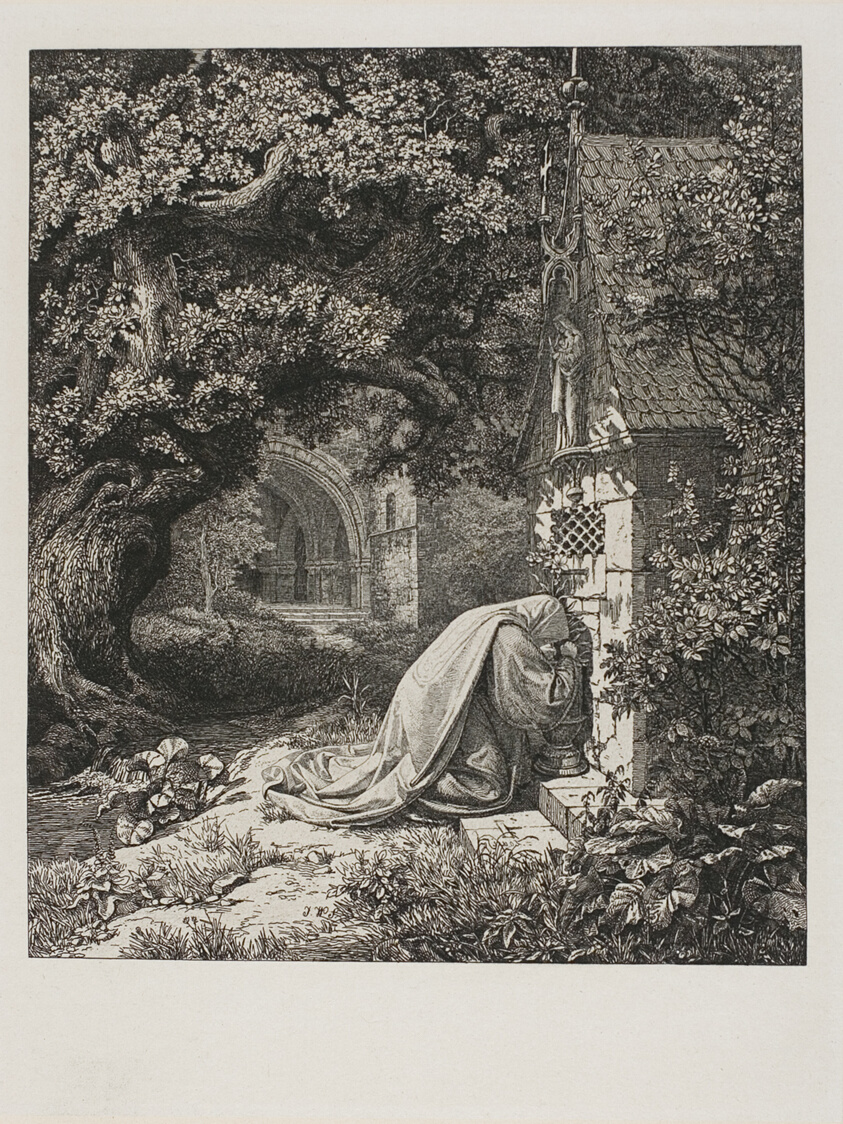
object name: Print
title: The Praying Nun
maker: Johann Wilhelm Schirmer (German, 1807-1863)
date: 1829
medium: Etching on off-white chine and buff wove paper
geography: Germany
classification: etching; print; prints and drawing